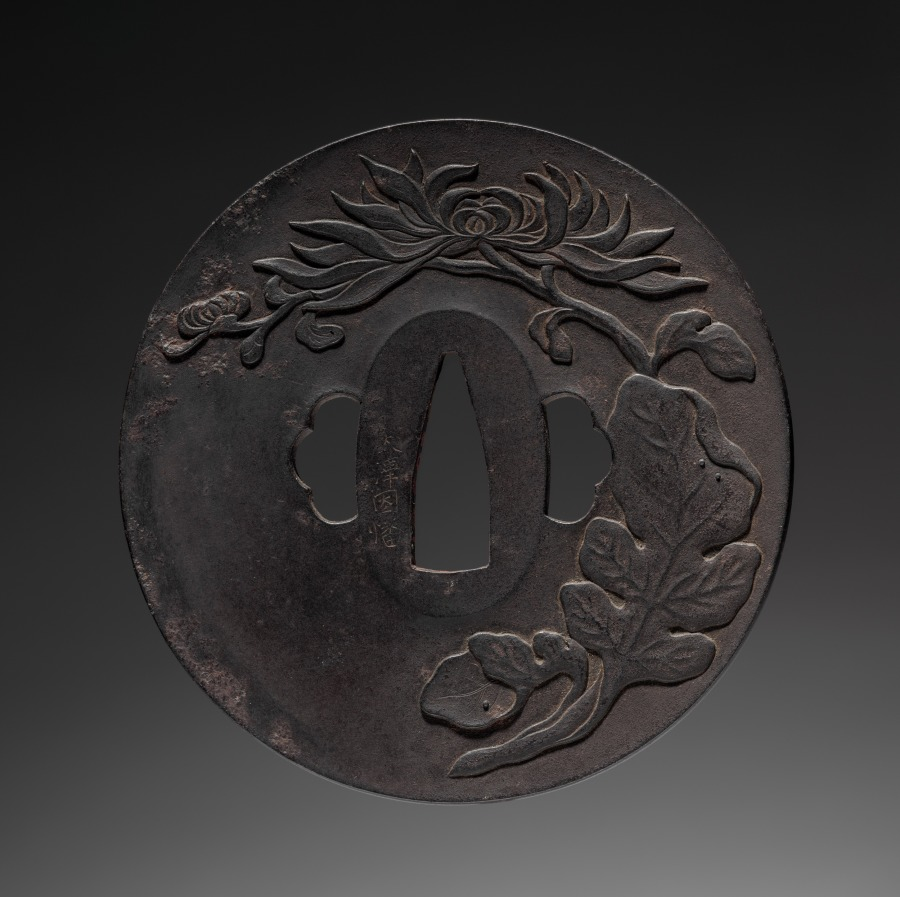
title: Sword Guard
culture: Japan, Edo period (1615–1868)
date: mid-1800s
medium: iron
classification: Arms and Armor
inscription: signed "Ozawa Inaba."